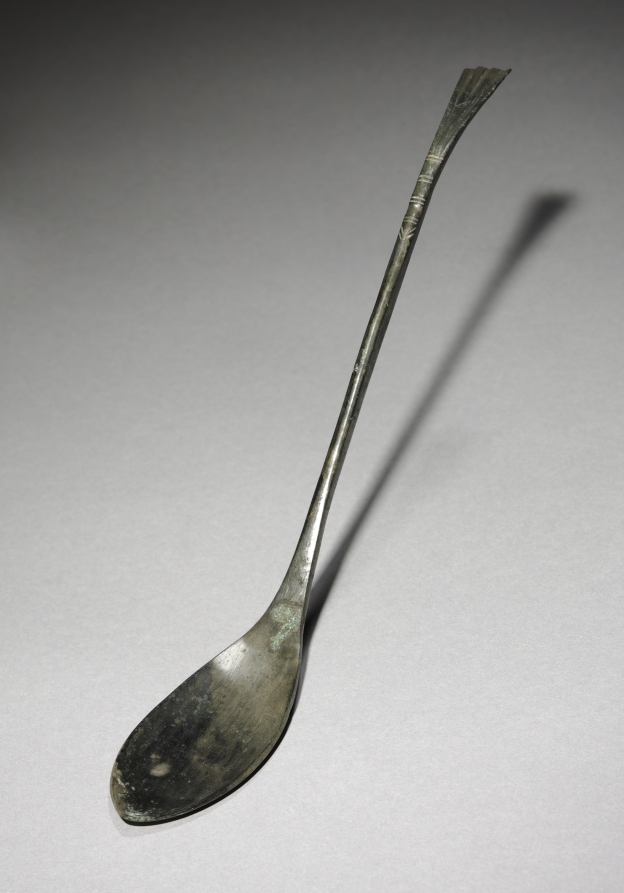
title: Spoon with Fish-Tail Design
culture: Korea, Goryeo dynasty (918–1392)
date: 918–1392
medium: bronze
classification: Metalwork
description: Many of Goryeo period spoons like this one feature a curved handle that splits into a jagged fishtail design. This fishtail design is not unique to Korea; it was also widely used in the area under the rule of two non-Han Chinese states: Liao (907–1125) and Jin (1115–1234). These seemingly ordinary objects testify to exciting material interactions between the Goryeo dynasty and non-Han Chinese northern states, which were often omitted from the official records.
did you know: Bronze spoons are the most common burial item. Scholars have proposed that toward the end of the 14th century, Koreans enjoyed meat-based soups more than any other dishes, explaining why spoons became common household items as well as burial goods.